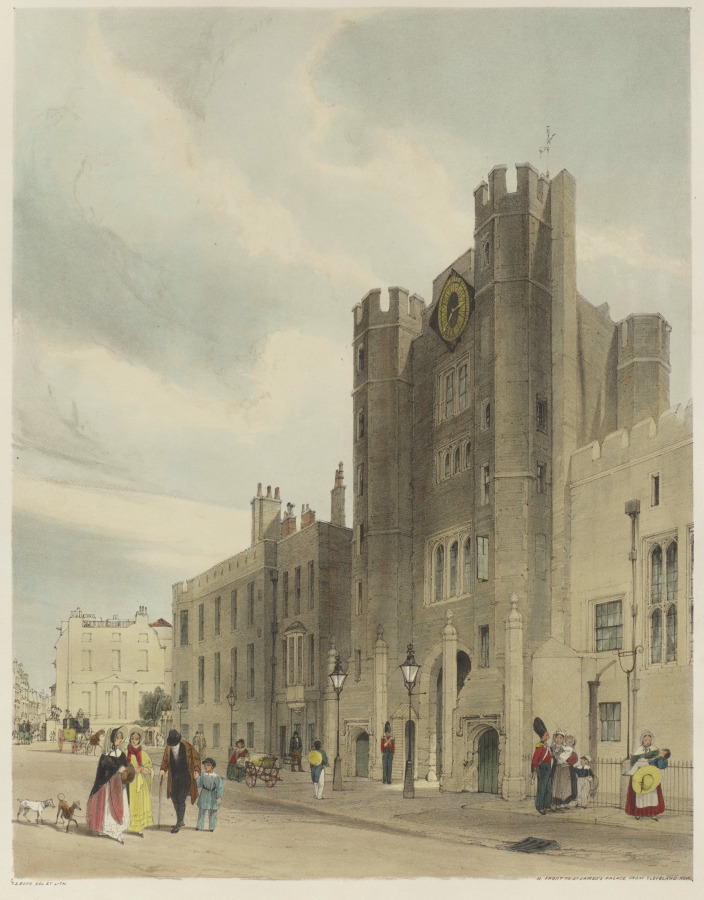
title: London As It Is: North Front to St. James's Palace, from Cleveland Row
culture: England, 19th century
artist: Thomas Shotter Boys (British, 1803–1874)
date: 1842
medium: lithograph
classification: Bound Volume